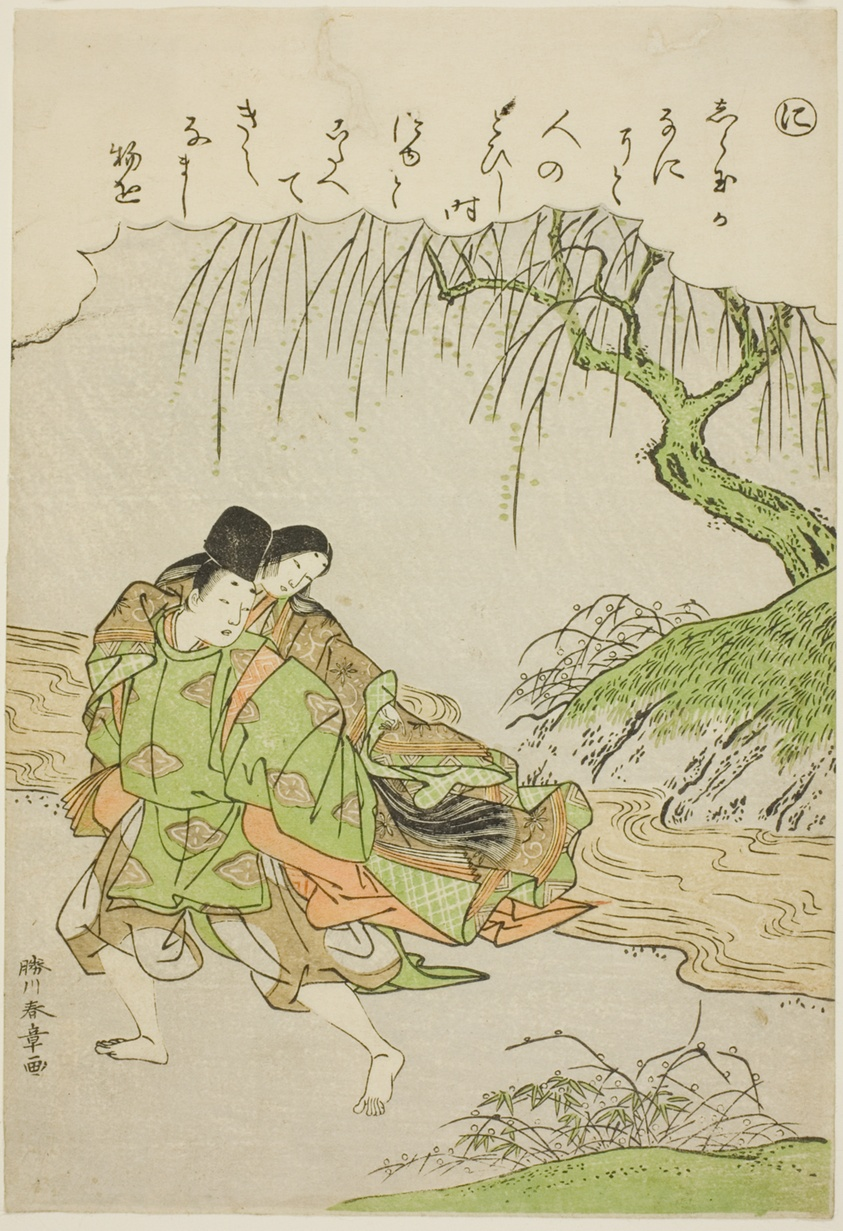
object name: Print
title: "Ni": Akutagawa, from the series "Tales of Ise in Fashionable Brocade Pictures (Furyu nishiki-e Ise monogatari)"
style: Japanese (culture or style)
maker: Katsukawa Shunsho 勝川 春章; Japanese, 1726-1792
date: c. 1772/73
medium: Color woodblock print; koban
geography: Japan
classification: woodblock print; print; asian art